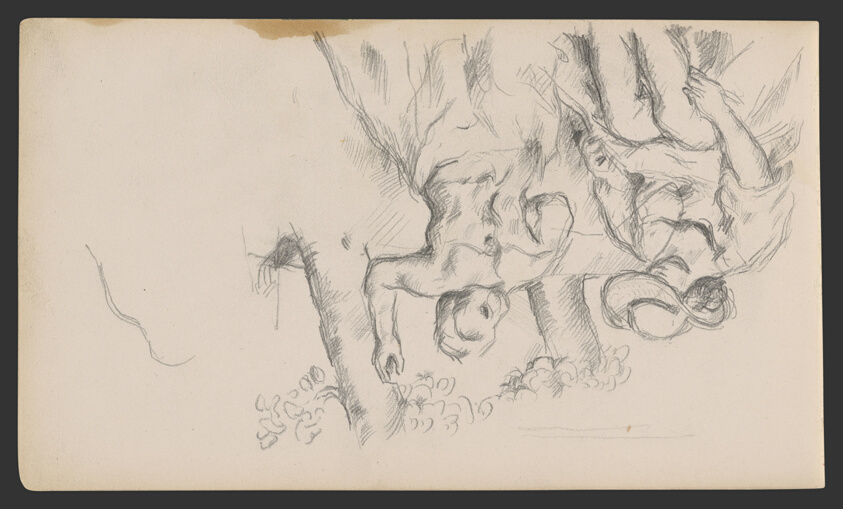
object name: Drawing and Watercolor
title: Sketchbook No. 2 (L'Estaque)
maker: Paul Cézanne; French, 1839-1906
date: 1875–86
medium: Graphite and pen and ink drawings on paper, bound into a book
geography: France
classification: sketchbook; graphite; prints and drawing; paper